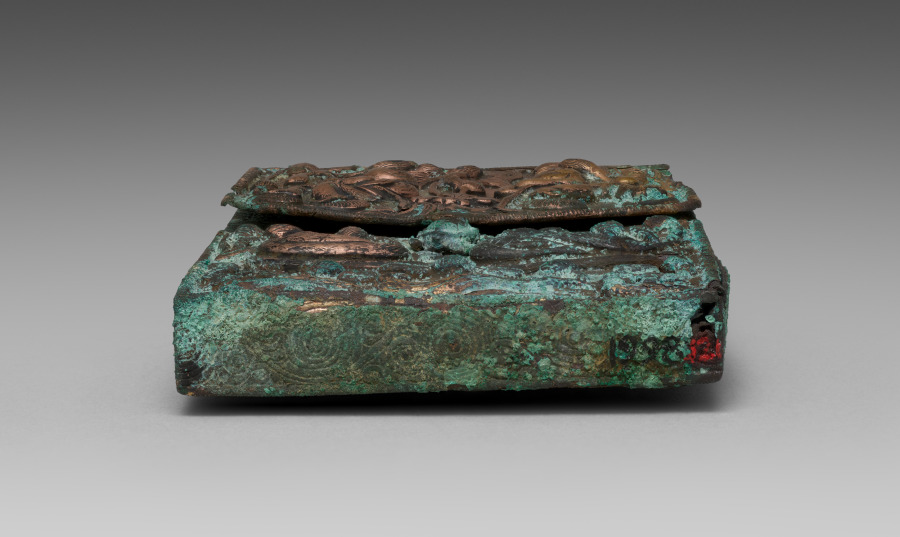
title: Sutra Container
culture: Korea, Goryeo dynasty (918–1392)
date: 1100s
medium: gilt bronze with incised and high relief decoration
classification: Metalwork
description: This is a portable container once used to preserve a miniature Buddhist sacred text. Created by hammering the reverse, high-relief designs on both the front and back of the case depict a peaceful pond where young boys are holding giant lotus flowers in their hands, and a pair of mandarin ducks are swimming. Probably the playful boys represent newly reborn souls in the Pure Land.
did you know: This is a portable container once used to preserve a miniature Buddhist sacred text, particularly useful for traveling Buddhist pilgrims.